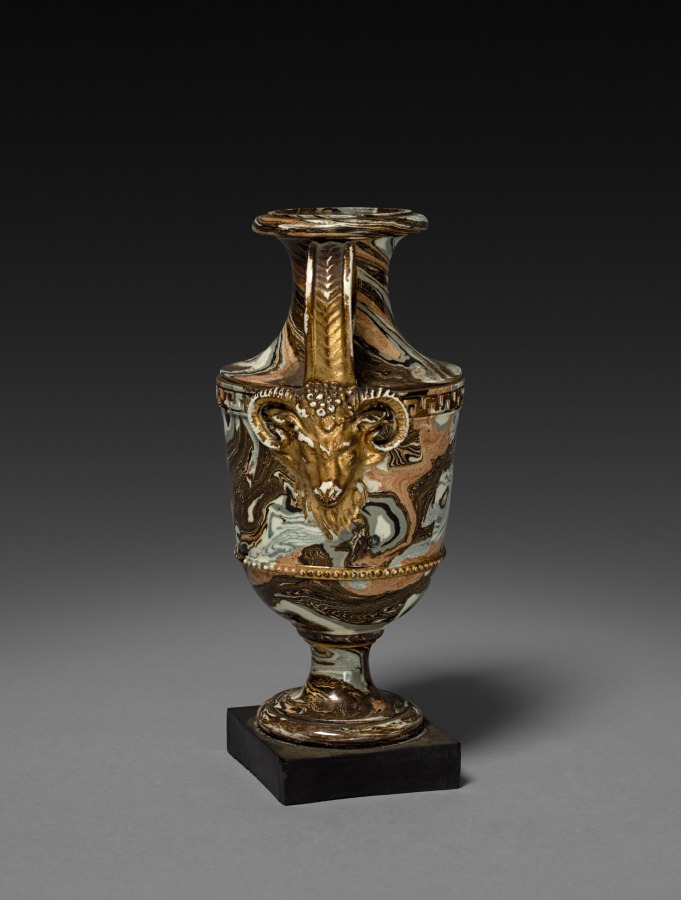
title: Urn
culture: England, late 18th or 19th century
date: late 1700s - 1800s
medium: earthenware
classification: Ceramic